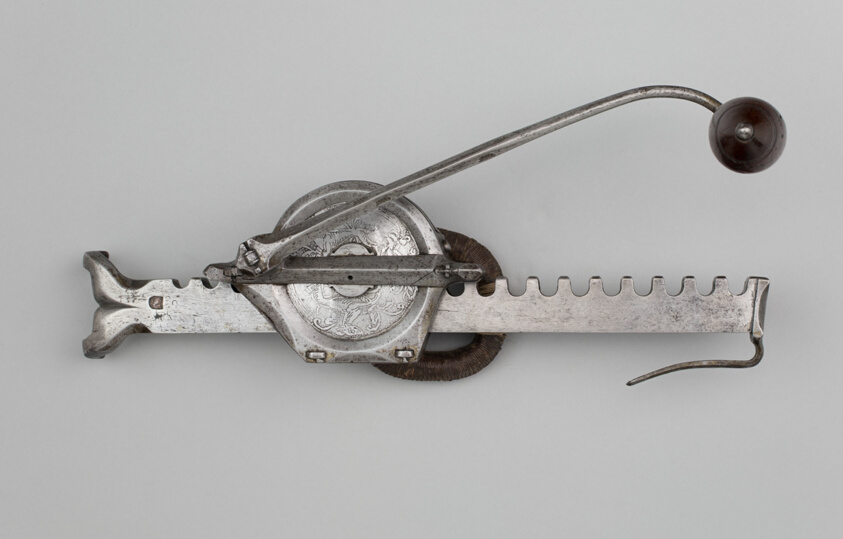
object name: Arms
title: Cranequin (Winder) for a Crossbow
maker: German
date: 1600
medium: Steel and wood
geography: Germany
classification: crossbow; arms; arms and armor